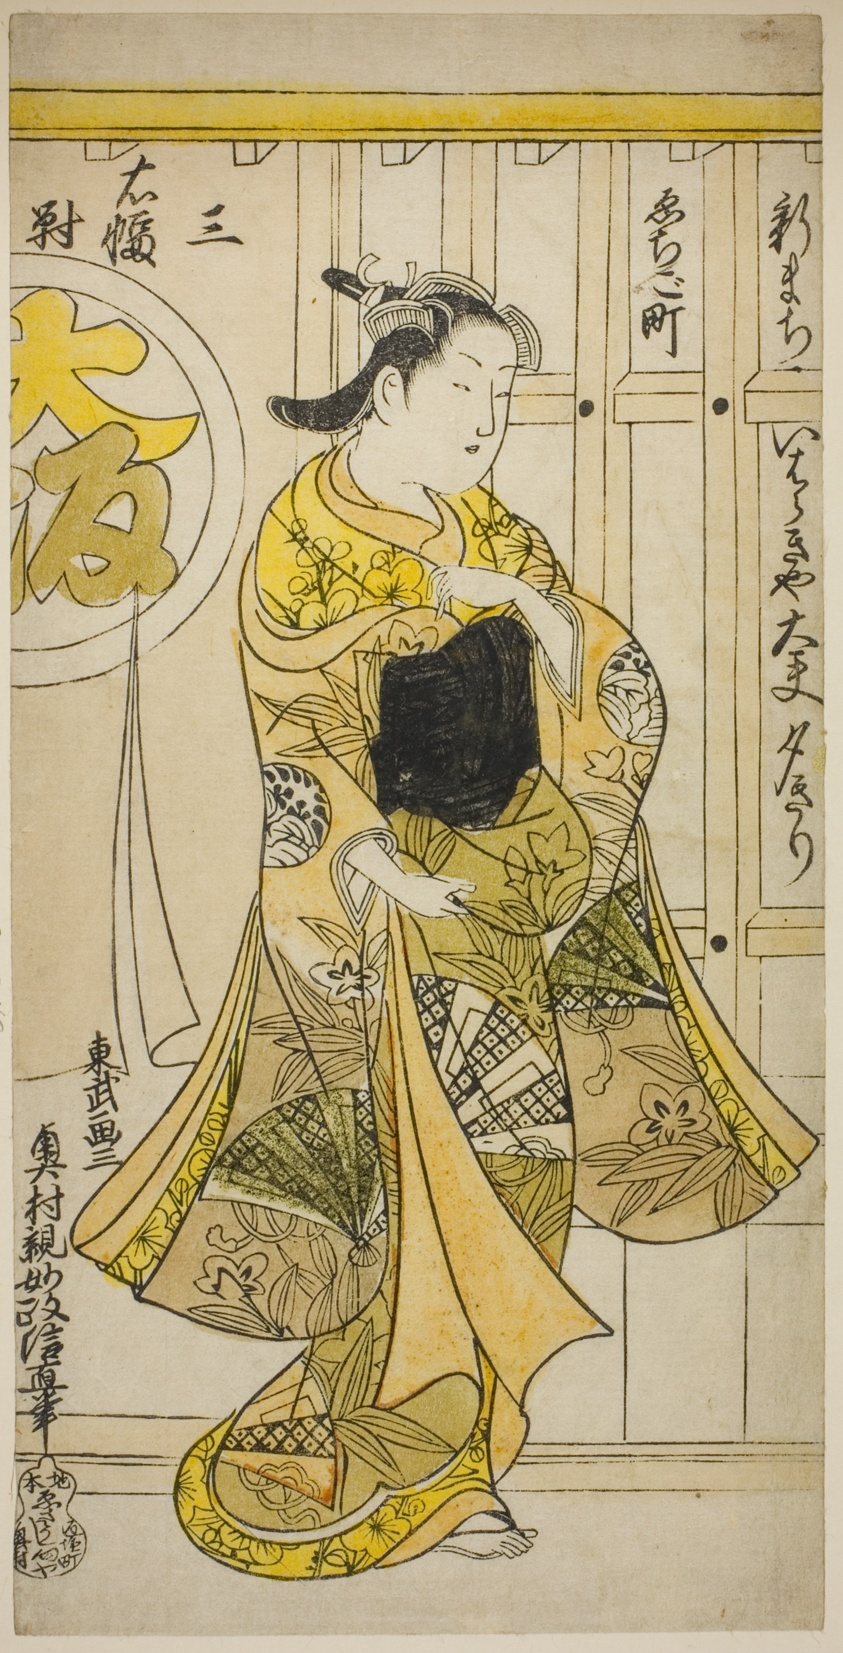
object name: Print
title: The Courtesan Yugiri of Ibarakiya, Osaka, from a triptych of beauties of the three capitals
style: Japanese (culture or style)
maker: Okumura Masanobu (Japanese, 1686-1764)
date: c. 1725/30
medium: Hand-colored woodblock print; left sheet of hosoban triptych, urushi-e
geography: Japan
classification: woodblock print; print; asian art